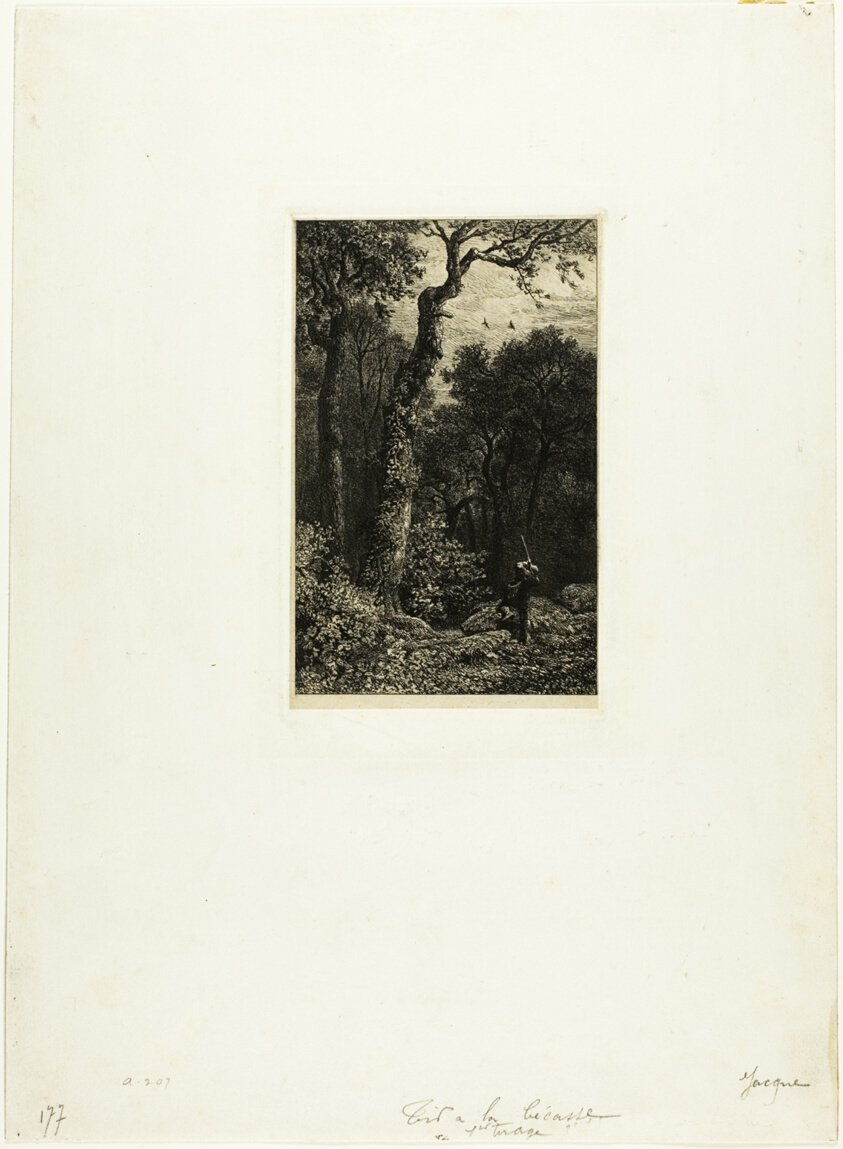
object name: Print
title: Shooting Woodcock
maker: Charles Émile Jacque (French, 1813-1894)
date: 1864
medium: Etching, drypoint and roulette on light gray China paper laid down on ivory wove paper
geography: France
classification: etching; print; prints and drawing